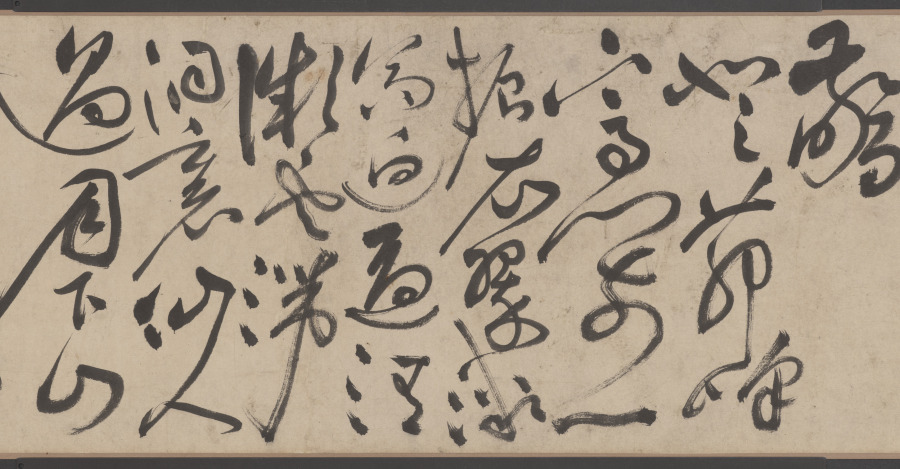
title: Retreat on an Autumn Day, in Cursive Script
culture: China, Ming dynasty (1368–1644)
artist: Zhu Yunming (Chinese, 1460–1527)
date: dated 1523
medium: Handscroll; ink on paper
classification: Calligraphy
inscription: 款識：讌於從一堂，爛漫醉書。癸未（1523）七月晦日也。枝山允明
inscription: 《閒居秋日》逃暑應能蹔閉關，未消多把古賢攀。並拋杯酌方為懶，少事篇章恐礙閑。風墮一庭鄰寺葉，雲開半面隔城山。浮生只說潛居易，隱比求（脫「名」）事更艱。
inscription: 《句曲道中》老至誰憐晝錦明，春來聊得客襟清。宵依星斗宮壇臥，曉（脫「入」）神仙宅舍行。眼看山多城郭少，肩挑詩重簿書輕。何時總入煙霞去。不見人間寵辱驚。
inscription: 《登茆峰》下馬門前一振衣，翠微高迥逼清微。雲端洞裡仙人過，月下山中長史歸。金焰暈牀砂氣伏，紫雲穿竇朮芽肥。神方能詠不能遇，一夜爽靈峰外飛。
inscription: 鈐印：「晞哲」、「允明」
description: This masterwork of calligraphy by Zhu Yunming from Suzhou combines two poems by the artist in cursive script style, characterized by its uninhibited, swift, and intuitive brushwork, so powerful that it here dissolved characters into dots or lines. Written from right to left and top to bottom and alternating in light dry to deep saturated ink, single characters may take a whole column or extend into the next one. Following the movement of the brush, they seem to dance over the paper.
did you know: Zhu Yunming stated that he was in an inebriated state when he created this work.